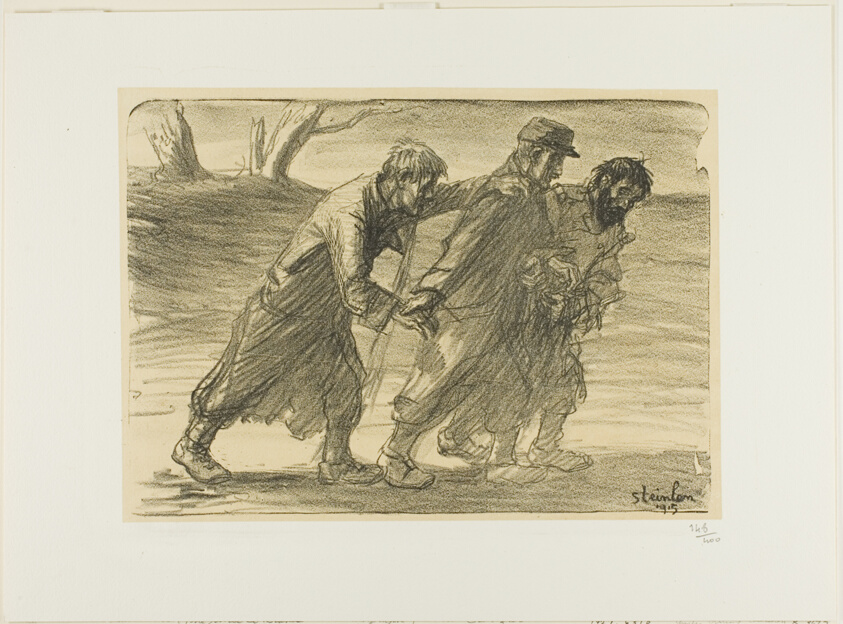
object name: Print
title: Three Comrades, plate five from Actualités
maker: Théophile-Alexandre Steinlen; French, born Switzerland, 1859-1923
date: 1915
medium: Lithograph in black over fawn tint on thick off-white wove paper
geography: France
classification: lithograph; print; prints and drawing